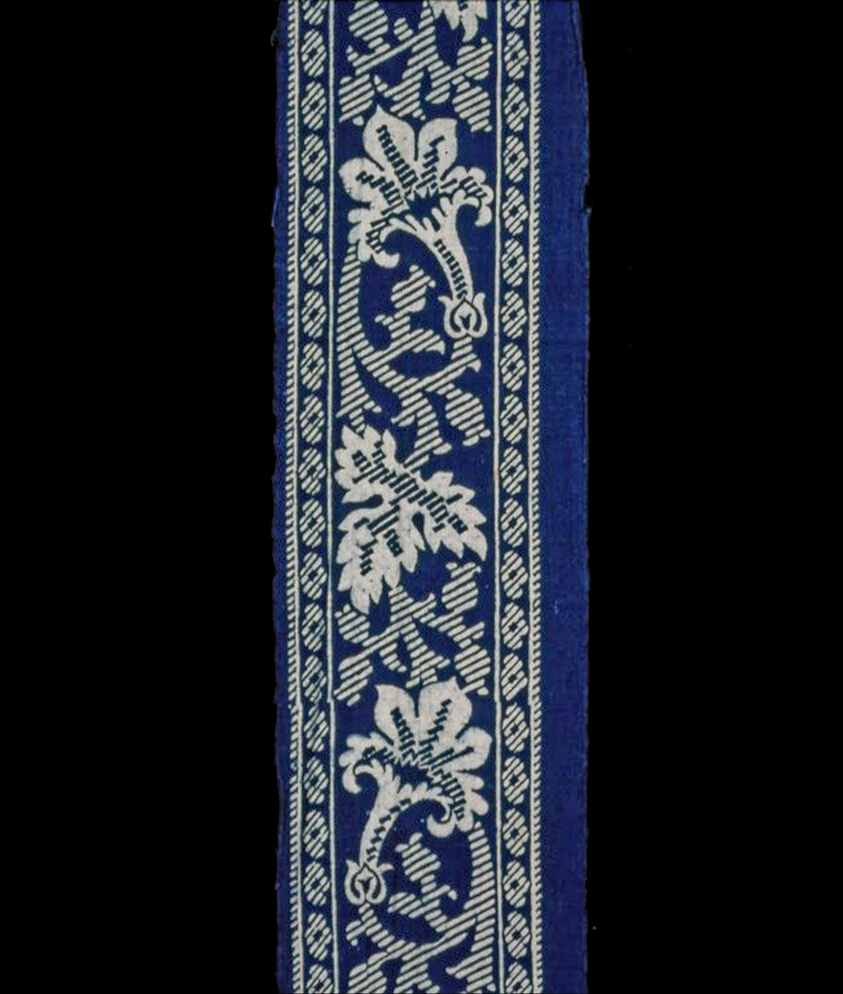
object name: Textile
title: Border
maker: England or United States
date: 19th century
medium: Cotton, plain weave; block printed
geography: England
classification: textile; weaving - printed